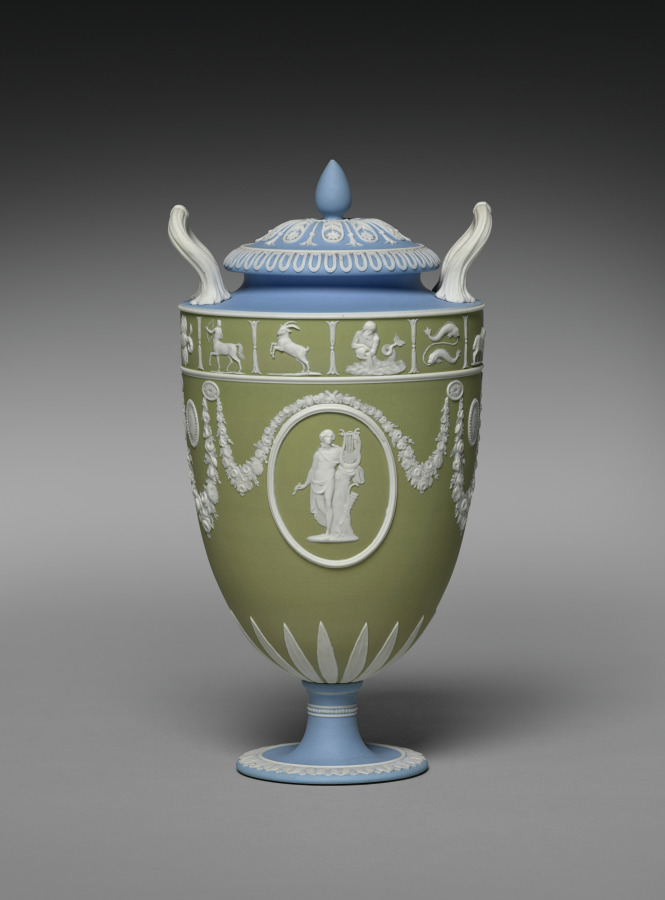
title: Covered Vase (one of a pair)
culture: England, Staffordshire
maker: Josiah Wedgwood and Sons (British, Staffordshire, est. 1759)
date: c. 1850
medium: jasper ware with relief decoration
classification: Ceramic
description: Wedgwood's tricolor jasperware first became popular in the 1770s during a period of fascination with neoclassical decoration. This vase was probably made around 1850 during the period when this type of decoration was revived. The relief medallions depict two versions of the Greek god Apollo, the god of music, next to his harp or lyre.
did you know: Signs of the zodiac form a decorative border around the upper portion of this vase.